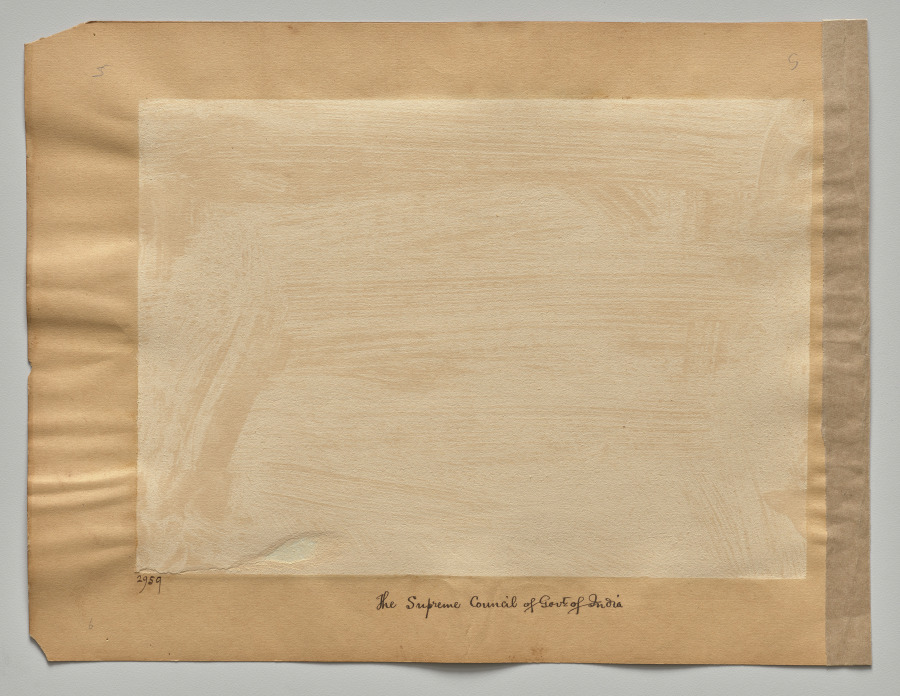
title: The Viceregal Council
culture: India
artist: Raja Deen Dayal (Indian, 1844–1905)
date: c. 1882–87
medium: albumen print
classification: Photograph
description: These photographs are part of an album, now disassembled, of around 105 photographs taken in India between 1885 and summer 1887 that provide glimpses into the lives of the British colonial elite and royal and upper-class Indians. The museum holds another group of 37 pictures from this album (2016.266), which was probably commissioned by a British civil servant visiting or working in India around 1888 as a personal souvenir of his experiences there.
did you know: Raja Deen Dayal is regarded now, and was considered during his lifetime, to be India’s most important 19th-century photographer.